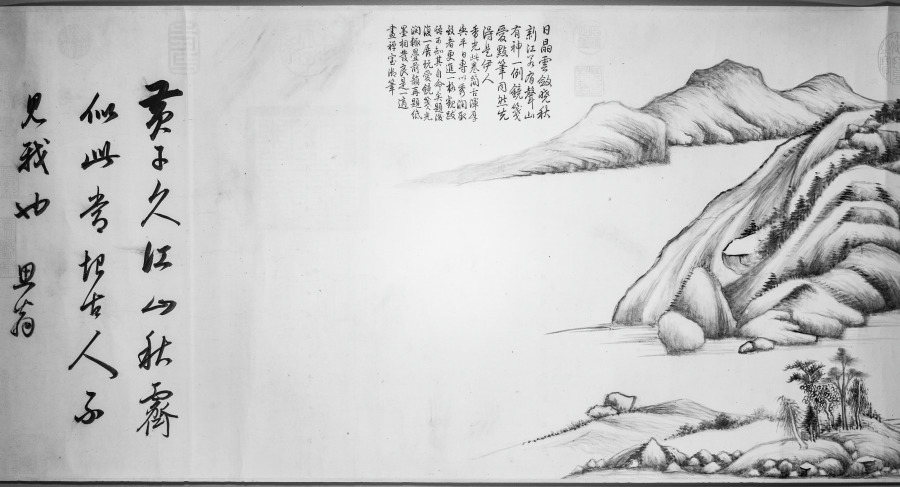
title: River and Mountains on a Clear Autumn Day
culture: China, Ming dynasty (1368–1644)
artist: Dong Qichang (Chinese, 1555–1636)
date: c. 1624–27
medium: Handscroll; ink on Korean paper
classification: Painting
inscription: 黃子久江山秋霽似此，當恨古人不見我也。思翁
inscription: 董文敏每遇高麗鏡面箋，書畫尤為入神。此卷改表紙用之，字跡隱然，兼有朝鮮之印。至於筆法圓秀，真接倪黃。豈文沈所可同日而語也。 康熙庚午中秋後一日，天氣澄爽，重裝初畢，跋於瓶廬。抱瓮翁高士奇。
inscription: Second inscription by Gao Shiqi 高士奇 (1645–1704): On the twenty-third day of the ninth month, the jiaxu year of the Kangxi era [1694], I packed my bags to head north. When my boat passed Wuchang [Suzhou], Mr. Mantang [Song Luo] brought wine to bid me farewell so that we could share our thoughts on our separation in the last few years. I showed him the paintings and calligraphy which I collected and asked his opinions. Since Mr. Mantang does not own any handscrolls by Wenmin [Dong Qichang], I leave this one for him in commemoration of our parting; thus the painting will have a worthy owner and our meeting will become a beautiful story in the future. It is the fourth day after the beginning of winter, with the sky clear and sober. Trees under frost have turned red and yellow, seemingly echoing the brush and ink in the painting. I also ask Mr. Mantang to inscribe a poem to commemorate our meeting so that it will survive forever.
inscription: 1 colophon and 4 seals of Song Luo 宋犖 (1634–1713): Who is the foremost art connoisseur of our dynasty?/ Tangcun [Liang Qingbiao, 1620–1691] is dead, so the title passes to Jiangcun [Gao Shiqi]./ Leaving office, you retired for five years in the Lake region./ Fondling handscrolls and hanging scrolls from morning to evening./ You sent me your collection catalogue Xiao Xia Lu last year;/ It is indeed the true equal of [Zhou Mi's] Yun Yan Guo Yan./ This year you returned to the capital by imperial order;/ Your boat with calligraphy and paintings anchored at the river bank in Suzhou./ When we met each other you did not waste any time for conversation by poured out immediately/ From your "coral net" extraordinary treasures./ You produced incomparable scrolls, with gold-inscribed labels and jade rollers,/ Pouring out from bags and trunks, they were spread in disarray./ Without a word, I rolled and unrolled until my fingers were numbed,/ We sat straight, facing each other quietly, and never felt tired./ For three days we forgot about sleeping and food./ And at times we shouted our joy out loud, forgetting who is host or guest./ Your Dwelling in the Fuchun Mountains and the Yuansheng manuscript/ These peerless works I myself examined with delight./ As an added pleasure to the farewell dinner under the Maple Bridge,/ You allowed me to hold again this handscroll by Dong Qichang--/ The Misty River and Piled Peaks [by Zhao Mengfu] and this Clear Autumn Day are two extraordinary masterpieces./ In showing such life and spirit with "qi yun." the artists were truly "men of heaven."/ The Clear Autumn Day is not even three feet long,/ Painted on tributary Korean paper, it shines like silver./ Every building up and every turn of the mountains imitates nature,/ Every tree and every rock is removed from the commonplace./ From the beginning, the theory of poetry is the theory of painting,/ Like the lotus and the morning sunshine, they complement and refresh each other./ The artist's inscription regrets that "the Old Masters cannot see my scroll."/ Huang Gongwang would have agreed in his grave./ The vermilion of the seals glitter and dazzles the eyes,/ These added accessories are as valuable as jade./ You are very kind to give it to me,/ The feelings expressed in your inscription are so sincere./ Wanting to refuse, but unable, I accept it to respect your wish,/ And taking off my gown and cap I wrapped it with care./ You asked me to write a long poem in commemoration of this beautiful occasion,/ I am too ashamed that my effort in response is so poor and inadequate./ Returning home, I unrolled it under candlelight, trying to write the colophon,/ The light of the waning moon shines at the foot of the mossy wall./ Earnestly humming and brows knit in deep thought, I try to compose;/ The verses are not outstanding, but the facts are real./ With this poem recorded at the end of the scroll, I mail it to you for approval,/ This poem and this painting shall outlast a thousand springs. (Translation by LYSL/HK/WKH)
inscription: 1 colophon and 2 seals of Shao Changheng 邵長蘅 (1637–1704); 2 inscriptions and 14 seals of the Qianlong 乾隆 emperor (r. 1736–95); 1 seal of the Jiaqing 嘉慶 emperor (r. 1796–1820); 3 seals of the Xuantong 宣統 emperor (r. 1908–11); 1 seal unidentified.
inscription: [印] 朝鮮國王之印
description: Dong Qichang had a tremendous impact on the artistic practices and historiography of later generations; his works and writings shaped literati aesthetics. Here, Dong places an abstract landscape composition diagonally across the picture plane, configured to recall earlier masters and simultaneously express his own personal style. Dong’s inscription claims, Huang Gongwang’s Autumn Day, looks like this. I truly regret the master has not seen my work. In fact, Dong Qichang may have had Dong Yuan’s Xiao and Xiang Rivers in mind, a work he owned and considered a key work in Chinese art history.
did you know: The painting has an imprint of a Korean seal that reads "Seal of the king of Joseon."